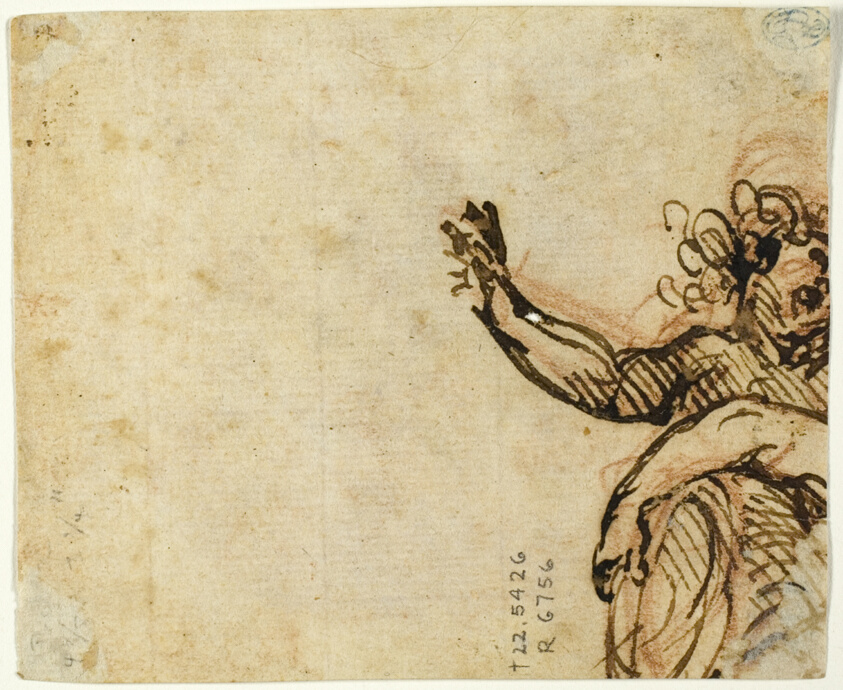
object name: Drawing and Watercolor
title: Head of Youth in Profile to Left (recto); Fragment of Figure Sketch (verso)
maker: Style of Pietro da Cortona (Italian, 1596-1669)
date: 17th century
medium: Red chalk (recto), and pen and iron gall ink over red chalk (verso), on ivory laid paper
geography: Italy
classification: drawings (visual works); prints and drawing